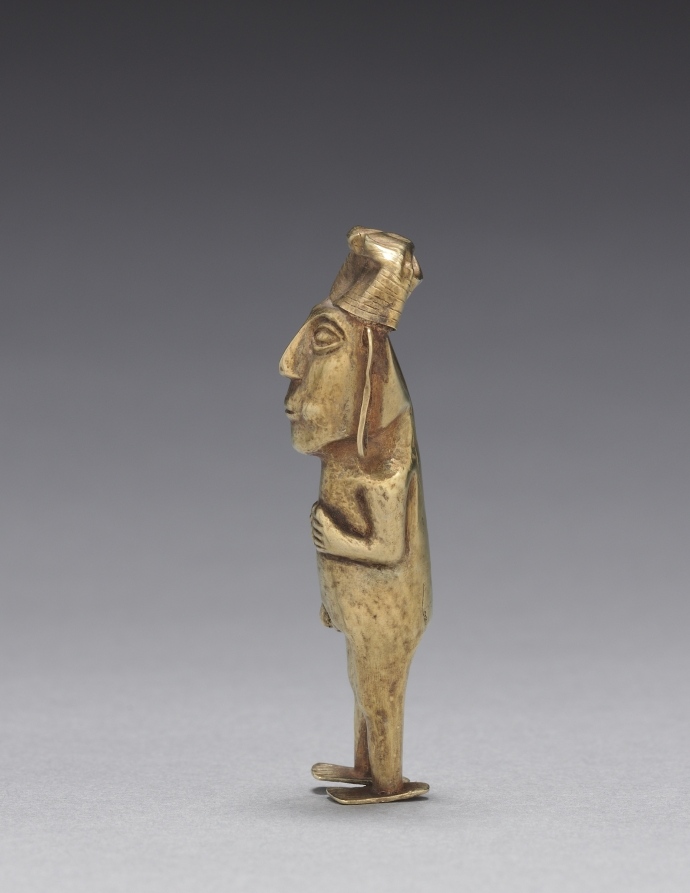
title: Male Figurine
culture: Peru, Lambayeque Valley, Inka style (1400-1532)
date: 1400–1532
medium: hammered gold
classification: Metalwork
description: Precious metal was a major Inka artistic medium, but most was melted down after the conquest to fund the Spanish court. The sole remains are small-scale objects from tombs and offerings. Figurines like this have been found at shrines on sacred mountain peaks, where they accompanied child sacrifices in offerings made during times of crisis, such as famine.